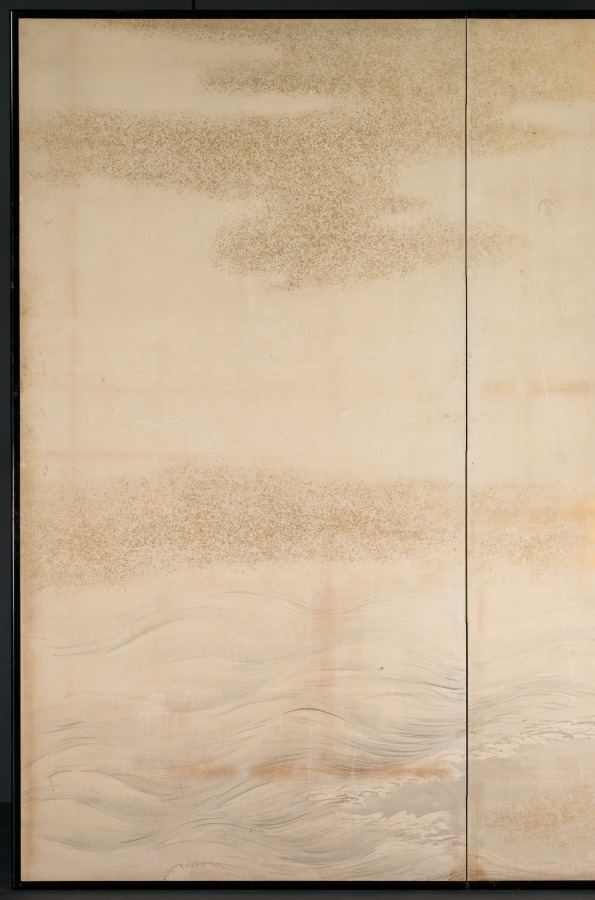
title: Geese, Reeds and Water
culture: Japan, Edo period (1615–1868)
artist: Yamamoto Baiitsu (Japanese, 1783–1856)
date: 1800s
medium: One of a pair of four-panel folding screens; ink, color, and cut gold foil on paper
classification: Painting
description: This byōbu composition differs from most in that it comprises two four-panel screens, rather than two six-panel units. Since the current mounting is modern, it is impossible to determine whether its present configuration represents its original design. Some panels may have been removed to help the screens better fit into a modern interior space. Baiitsu worked almost exclusively in monochromatic ink tones and favored classical Chinese painting themes.